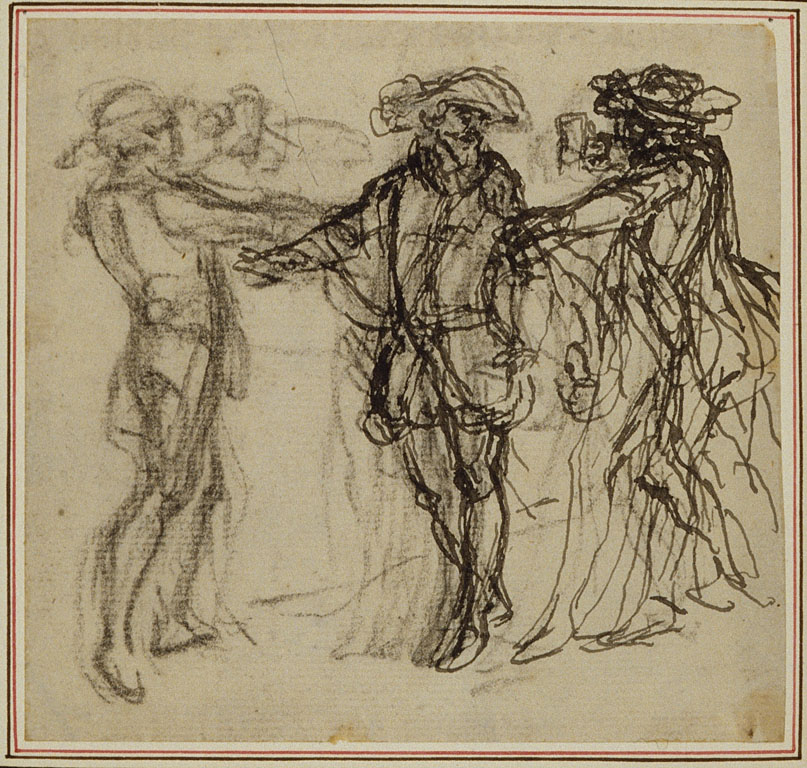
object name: Drawing and Watercolor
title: Study for a second edition, never published, of Colle's "La Partie de Chasse de Henri IV", Act II, Scene 11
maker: Hubert François Gravelot (French, 1699-1773)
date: before 1766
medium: Pen and black ink, with black chalk, on pale gray laid paper, perimeter mounted on ivory laid paper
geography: France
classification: pen and ink drawings; drawings (visual works); prints and drawing